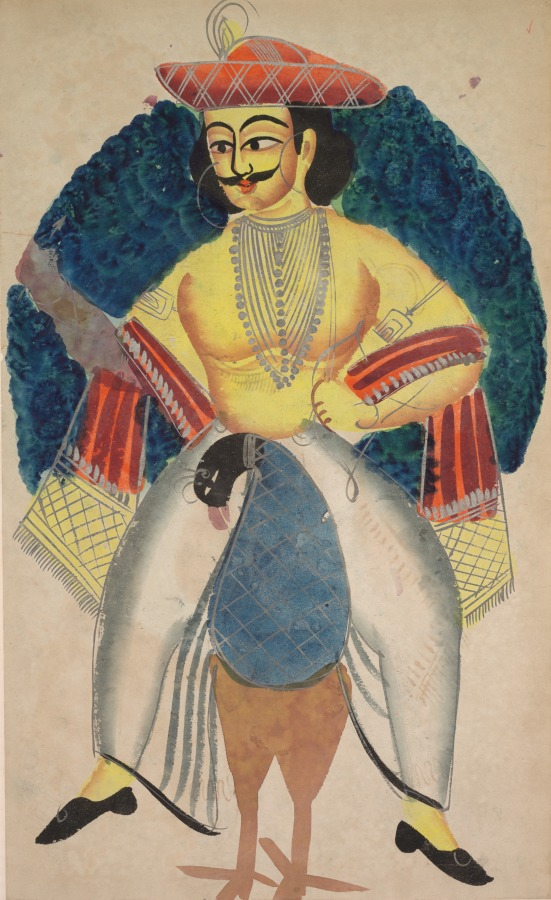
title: Kartikeya, from a Kalighat album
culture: Eastern India, Bengal, Kolkata, Kalighat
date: c. 1890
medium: Gum tempera, graphite, ink, and tin on paper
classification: Painting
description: Here Kartikeya, god of war and son of Shiva and Parvati, born to annihilate the demon Taraka, is provocatively depicted as a dandy. Sitting astride his vehicle, the peacock, Kartikeya has a Prince Albert hairstyle and buckled European shoes. Fashionably draping his shawl, Karitkeya’s backdrop is a halo created by the peacock’s tail. The painting integrates prevailing Bengali social mores with traditional images and themes.